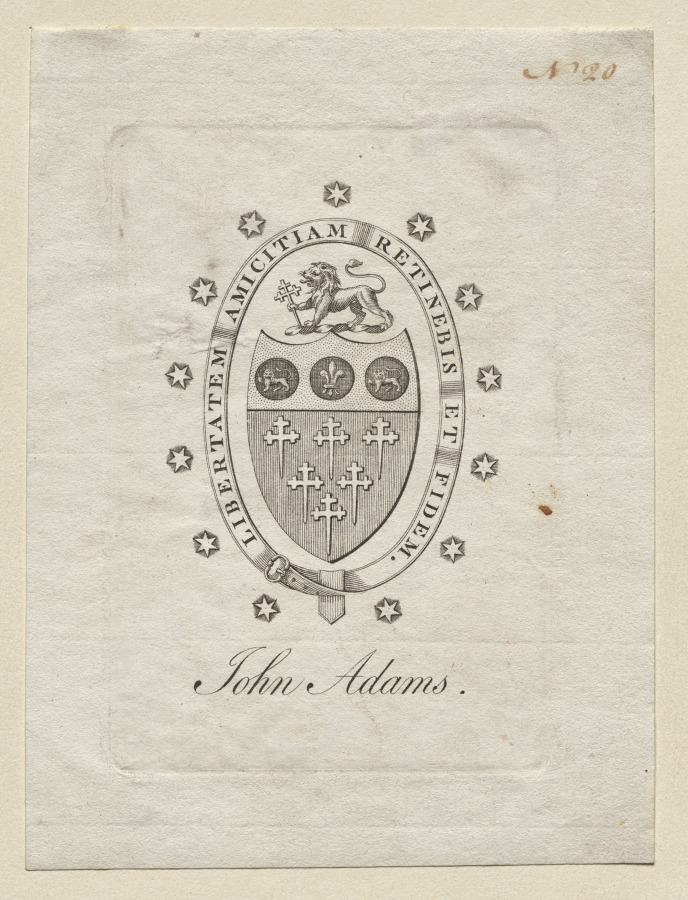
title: Bookplate: Coat of Arms with John Adams inscribed below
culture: America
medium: engraving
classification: Print